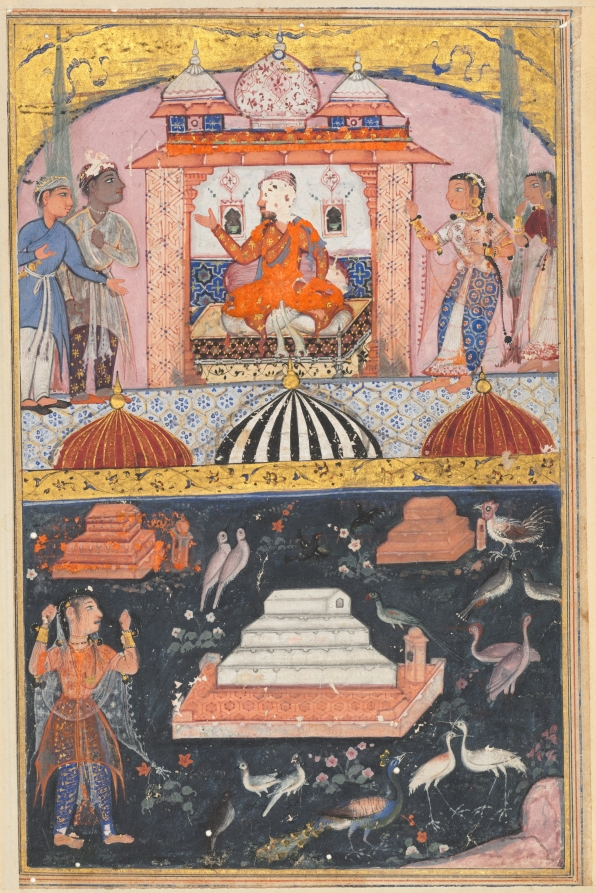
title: The merchant hears of his wife’s unfaithfulness (above); the unfaithful wife performs penance by plucking her hair (below), from a Tuti-nama (Tales of a Parrot): First Night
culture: Mughal India, court of Akbar (reigned 1556–1605)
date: c. 1560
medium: gum tempera, ink, and gold on paper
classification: Painting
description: In the upper register the merchant is surrounded by gossiping members of his household. Below, birds surround his unfaithful wife. The merchant’s parrot, whom the wife tried to kill, perches on the edge of a tomb to observe her act of penance. Once her penance is complete, the parrot reunites the couple, and the wife is welcomed home.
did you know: The birds in the garden have gathered in in sympathy with the parrot’s plight.